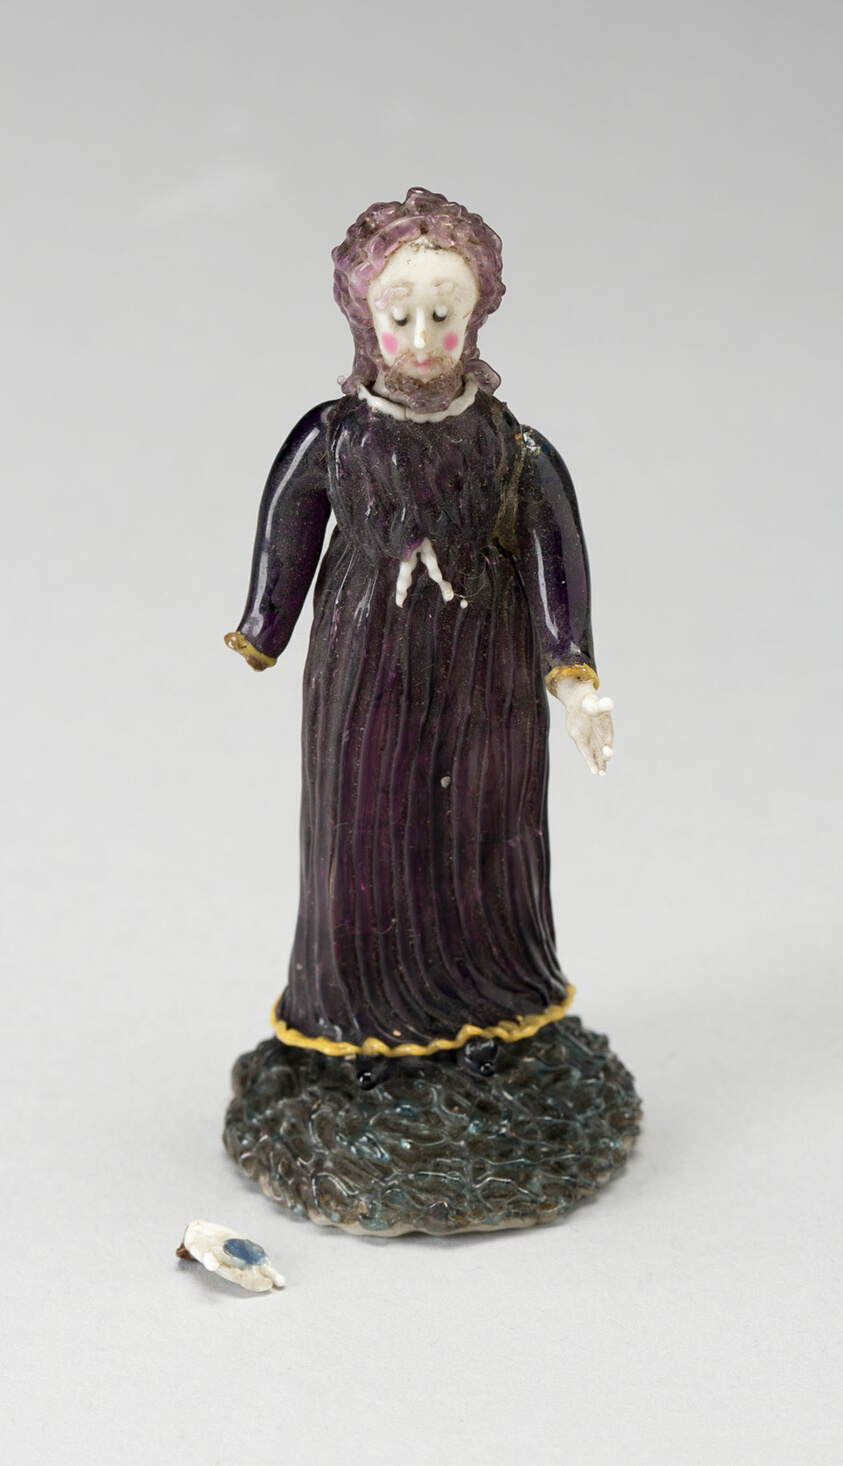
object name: Glass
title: Monk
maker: Nevers, France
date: 1700/50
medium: Glass; lampwork (verre de Nevers), metal armature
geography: France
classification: decorative object/ornament; lampwork; glass; european decorative arts